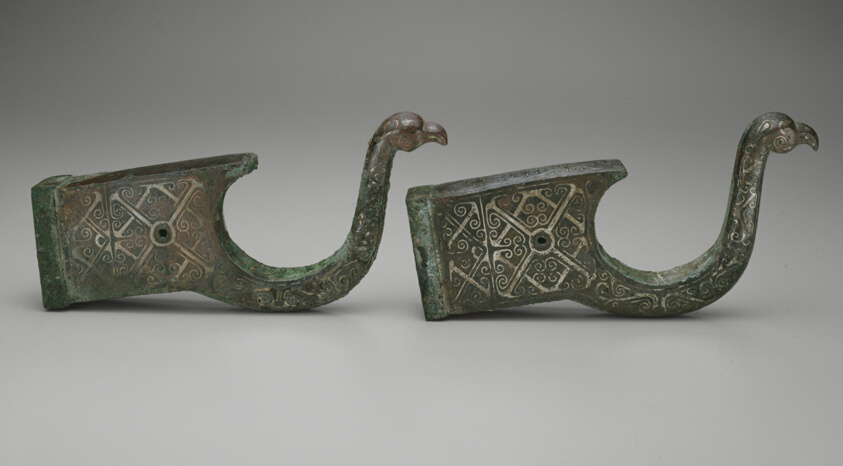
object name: Decorative Arts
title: Bow Support for a Crossbow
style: Chinese (culture or style)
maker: China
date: Eastern Zhou dynasty, Warring States period (480–221 B.C.), c. 4th century B.C.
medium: Bronze inlaid with strand silver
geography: China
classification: bronze; metal; weapon; asian art; decorative arts